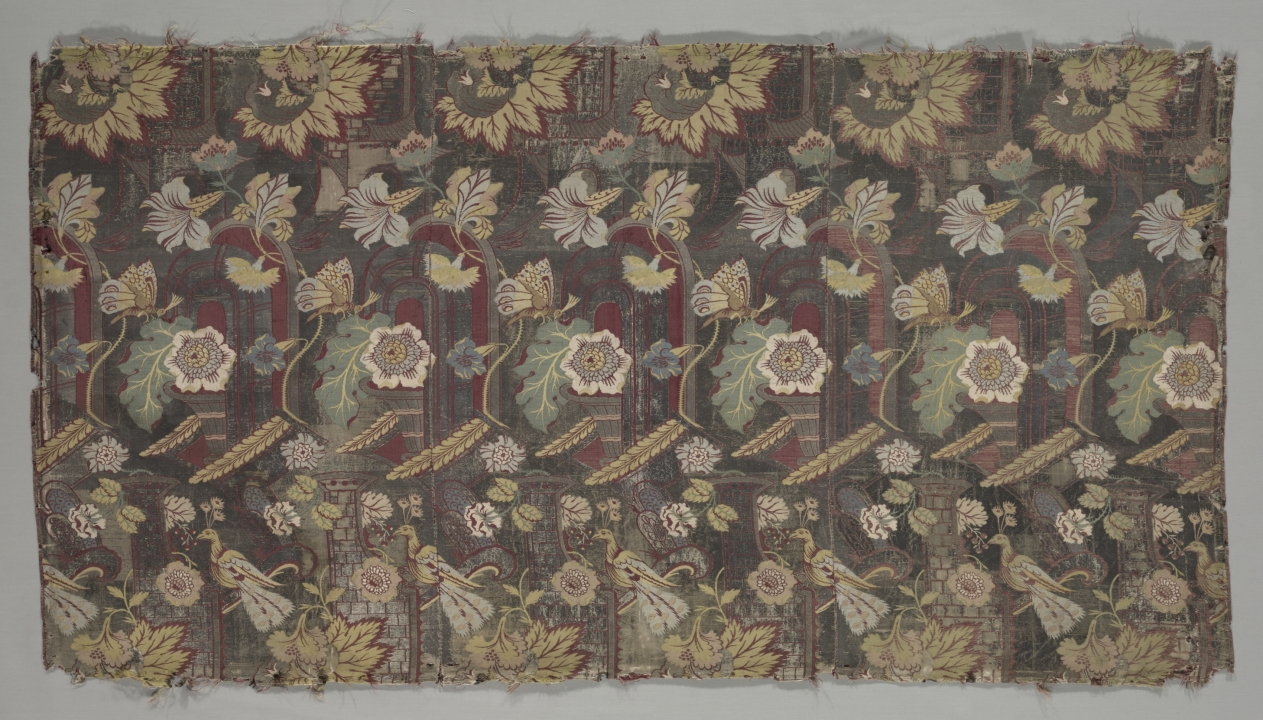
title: Length of Brocade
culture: Italy, late 17th century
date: late 1600s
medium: plain compound twill, brocaded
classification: Textile